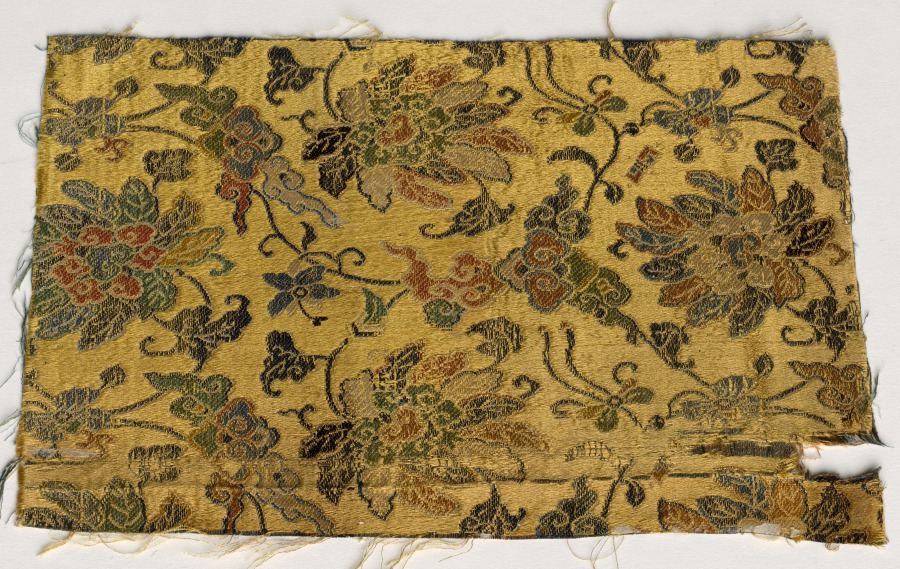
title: Fragment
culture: China, 18th century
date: 1700s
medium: satin ground; silk diasper weave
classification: Textile